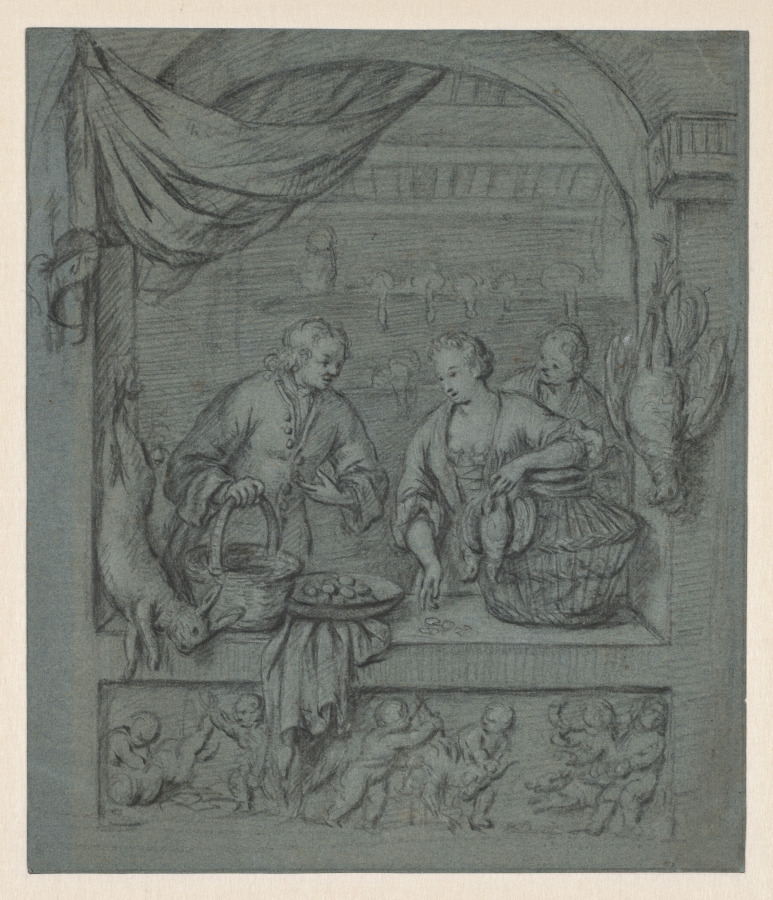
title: The Bird Seller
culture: Netherlands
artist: Willem van Mieris (Dutch, 1662–1747)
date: c. 1700–1710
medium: black and white chalk on blue paper, laid down on brown paper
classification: Drawing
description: In this market scene, the Dutch artist Willem van Mieris portrayed a man and woman in a poultry shop who negotiate over the price of a bird. A curtain is pulled aside above to reveal the scene—as if the viewer sees something in secret—while a faux relief panel below them portrays amorous putti. Market scenes portraying a man and a woman often carried amorous or lascivious connotations in 17th-century Holland, undertones that were acknowledged and enjoyed by the middle-class patrons who purchased such works.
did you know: In 17th-century Holland, market scenes portraying a man and a woman often had amorous undertones.